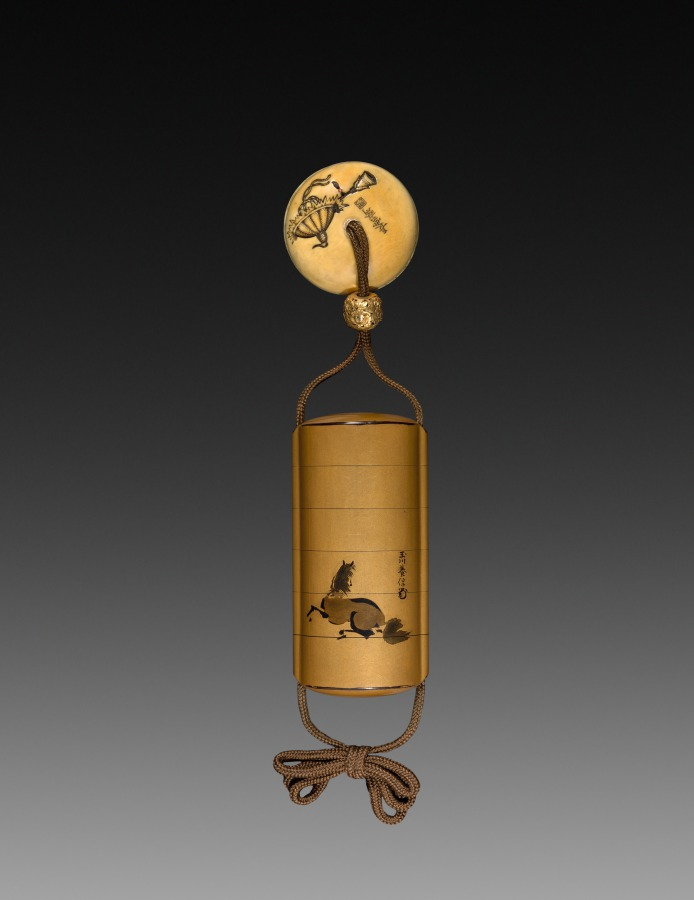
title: Inro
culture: Japan, Edo period (1615–1868)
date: early 1800s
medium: lacquer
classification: Lacquer